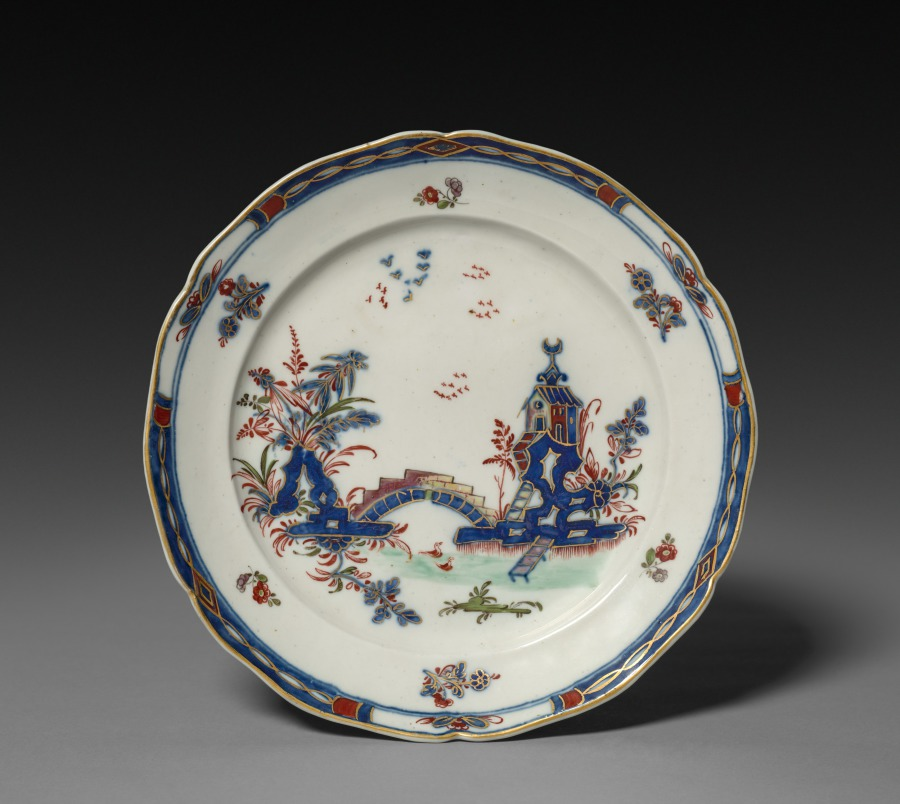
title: Plate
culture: Italy, Venice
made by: Cozzi Porcelain Factory (Italian)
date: 1770–90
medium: soft-paste porcelain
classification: Ceramic